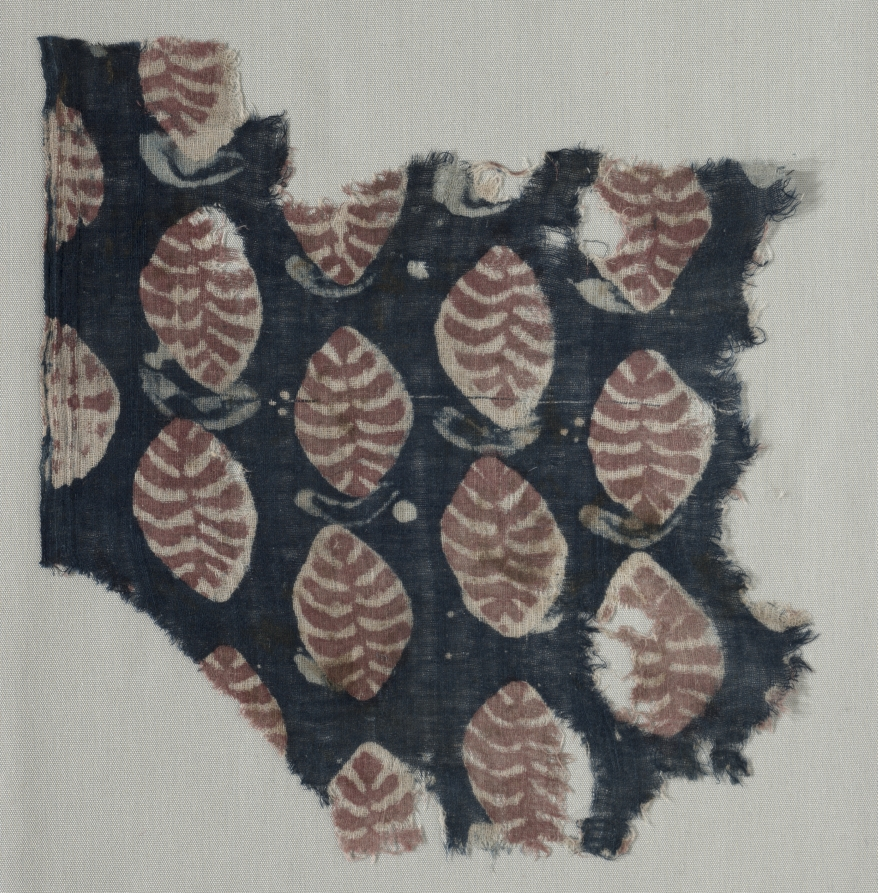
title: Fragment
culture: India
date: 1400s (?)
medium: drawn resist, painted mordant, dyed; cotton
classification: Textile